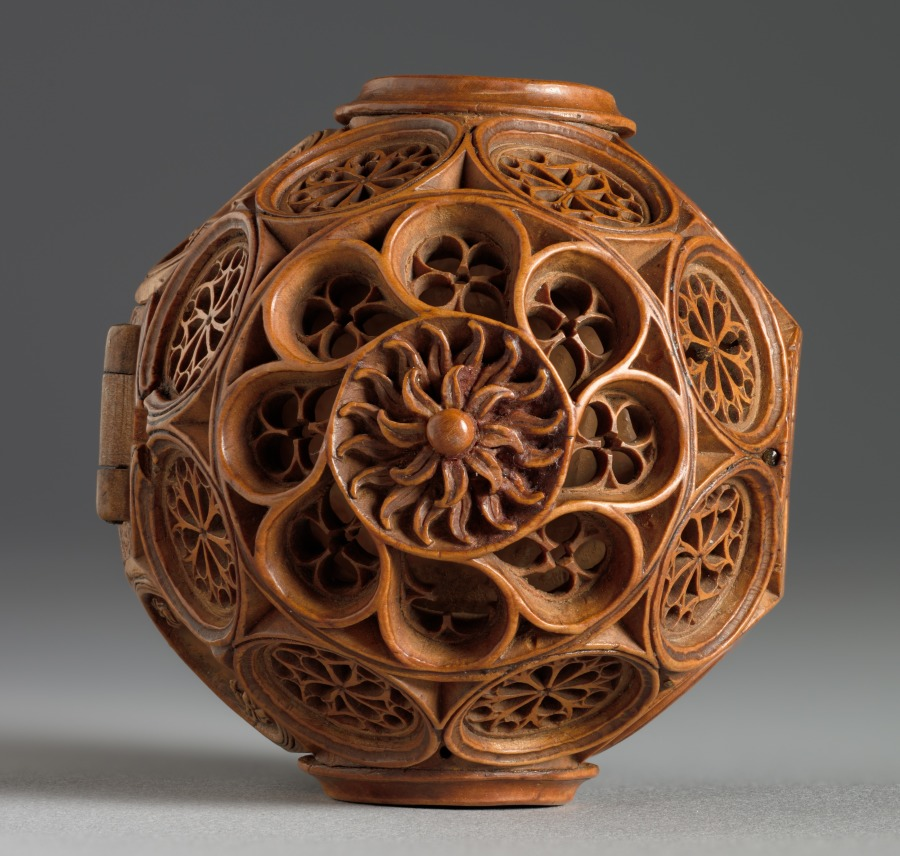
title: Prayer Nut with Scenes from the Life of St. James the Greater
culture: Northern Netherlands (Holland)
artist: Adam Dircksz (Netherlandish, active c. 1500)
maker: and Workshop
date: c. 1500–1530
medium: boxwood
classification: Sculpture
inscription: Interior around lower half: SANCTVS SACRILEGI STAT IVDICIS ANTE TRIBVNAL (Holiness stands before the throne of the profane judge)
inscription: Interior, around upper half: GAVDENS PRO CRISTO IACOBVS SVBDIT CAPVT ENSI (St James submits his head to the sword)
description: Prayer nuts are capsules that can be opened in half and were mainly worn from the end of the 1400s until 1530, particularly in the Netherlands. These objects are generally made from boxwood and carved with extreme refinement and delicacy. They often echo Gothic architecture and include openwork tracery or elaborate decorative patterns. Prayer nuts came into fashion for private devotion as a pendant on the rosary or on a decorative chain. The emergence of prayer nuts went hand in hand with the practice of praying the rosary more frequently at the end of the Middle Ages.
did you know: This miniature masterpiece was held and caressed within the palm of the holder as they prayed and meditated on their faith. What do you use to focus or engage in quiet concentration?